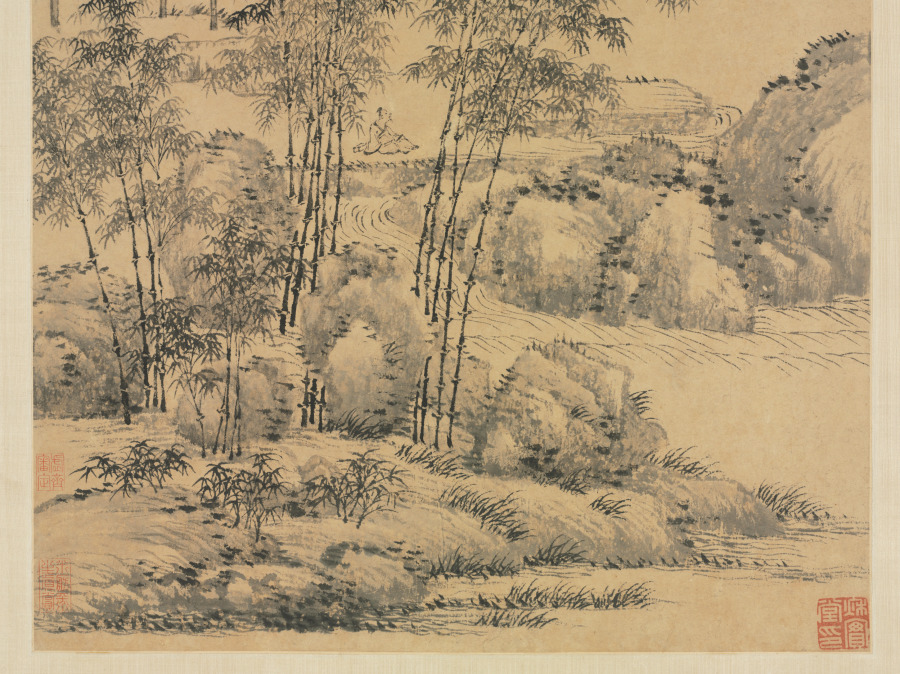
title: Tall Bamboo and Distant Mountains, after Wang Meng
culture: China, Qing dynasty (1644-1911)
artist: Wang Hui (Chinese, 1632–1717)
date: 1694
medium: Hanging scroll; ink on paper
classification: Painting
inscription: 昔文湖州有暮靄橫看。宋思陵題識卷首：觀其筆力不在郭煕之下。於樹石間寫叢竹，乃自其肺腑中流出，又不可以筆墨畦徑觀也。 子文廣文出紙求畫修竹遠山。惜乎僕之筆力，不能似郭。又敢彷彿湖州也哉？至若拙朴鄙野，縱意塗抹，聊可以寫一時之趣。姑塞廣文之雅意云。黃鶴山中人王蒙書。 歲次甲戌九月望後三日為冝翁先生臨于長安寓齋。海虞, 王翬。[印]王翬之印; 石谷子.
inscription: 3 additional seals: 1 of Pang Yuanji 龐元濟 (1864–1949); 2 unidentified.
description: Wang Hui studied paintings by earlier masters and digested their styles with unceasing virtuosity. He had such enduring affection for a landscape by Wang Meng 王蒙 (about 1308–85) that between 1686 and 1712, he made several copies, like this example. One of his compositional transformations here was moving the scholar from the pavilion directly into the landscape by the stream. His faithful copying also included inscriptions. Wang Meng had written that he was trying to resuscitate the style of an earlier artist, Wen Tong (1018–1079); therefore, Wang Hui sought to revive both Wang Meng and Wen Tong.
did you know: As a leading figure in the Orthodox School of Chinese painting, Wang Hui believed that the act of painting was a dialogue with one or more masters of the past.